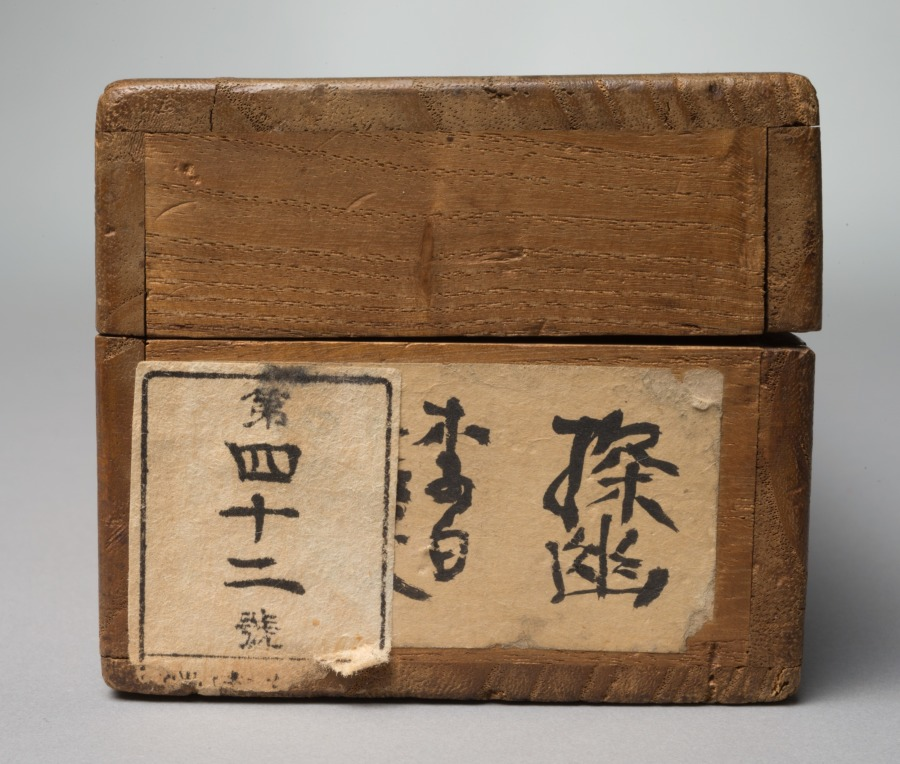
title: Chinese Sages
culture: Japan, Edo period (1615–1868)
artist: attributed to Kano Tan’yū (Japanese, 1602–1674)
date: mid- to late 1600s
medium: hanging scroll; ink and color on silk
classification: Painting